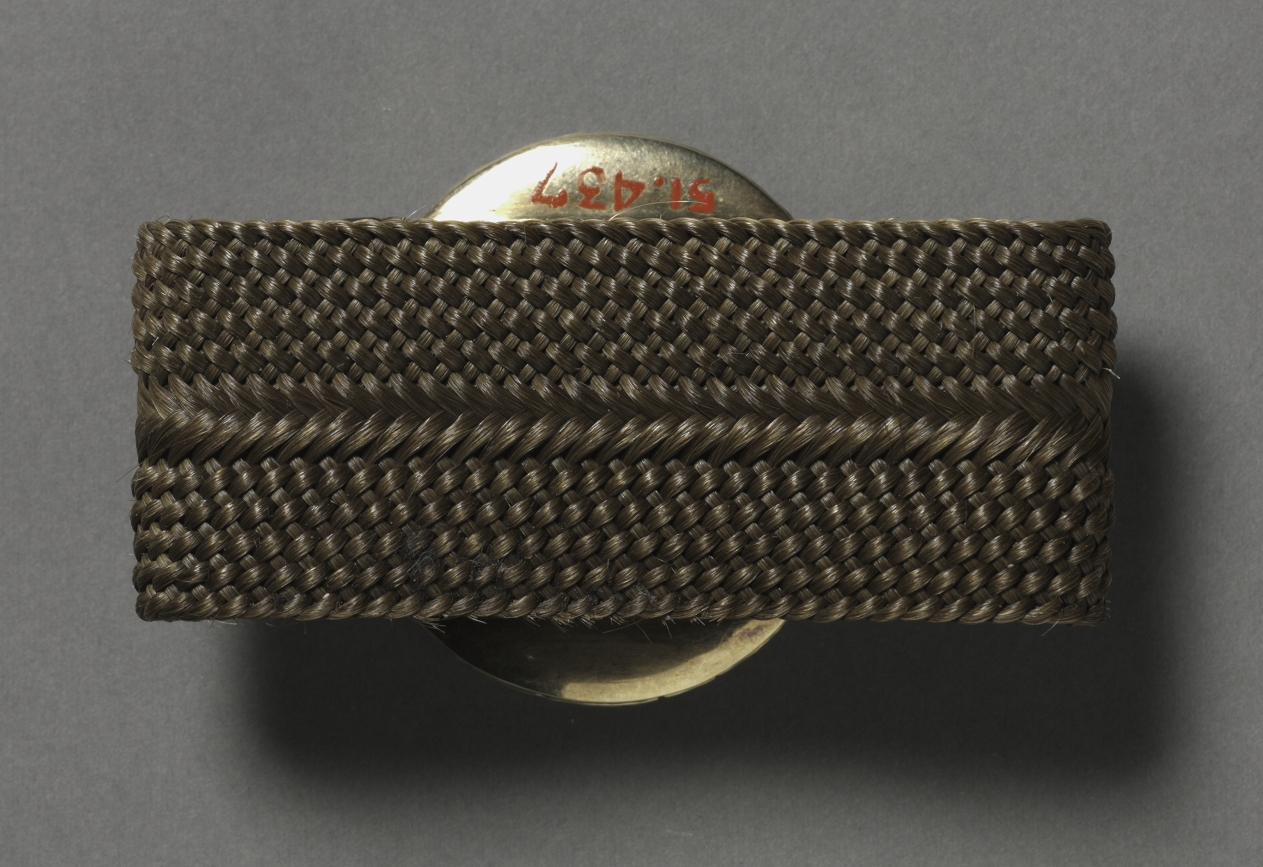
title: Portrait of Constantine Phipps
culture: England, 18th century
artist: John I Smart (British, 1741–1811)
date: 1770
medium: watercolor on ivory in a later gold and woven hair bracelet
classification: Portrait Miniature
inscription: signed lower left: J.S. / 1770.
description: John Smart painted the British gentleman Constantine Phipps (1746–1797) at the age of twenty-four, executing this portrait in 1770, the year following the death of the sitter’s father, Constantine Phipps (1710?–1769), and preceding his marriage to Elizabeth Tierney (d. 1832). Phipps the younger was the second son of a landowner and lived throughout England and France. In 1788 he moved his family to Caen, Normandy, hoping to educate his ten (eventually thirteen) children more economically. Phipps and his wife returned to England in 1792 to attend their daughter’s wedding. The escalating conflict between France and England prevented Phipps from returning to France where he had left eight children behind. Unfortunately, he did not see them before his death five years later. The portrait represents Phipps’s nearly full face. He has light brown eyes and natural brown hair worn en queue. He wears a green coat with a small collar, a white waistcoat embroidered with gold, and a high, white stock collar. Phipps is depicted against an olive-gray background. This early work by Smart already exhibits hallmarks of the artist’s style, such as the plain, gray background, the sitter’s colorful clothing, and his expressive eyes and slightly upturned mouth, which suggest that Phipps was a self-assured man with a sense of humor. The small format is also characteristic of the first decade of Smart’s career. This miniature is mounted in an elaborately carved gold frame on a bracelet made of gold and woven light brown human hair. The bracelet was executed later than the miniature and is in the style of the 1830s or 1840s. The inscription on the clasp reads “E. C. E. T. / Nov.r 29th 1838, aged 7” and may indicate that this bracelet was given to Constantine’s great-granddaughter Elizabeth Clarissa Emilie Toker (1831–1888) on her seventh birthday possibly by her mother or grandmother. There is a variant of this work in the Phipps collection in London. Painted in 1771, this miniature descended from Colonel Pownoll Phipps, the seventh child of Constantine Phipps, to John Constantine Phipps.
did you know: This miniature is mounted to a bracelet that was made at least 50 years later.